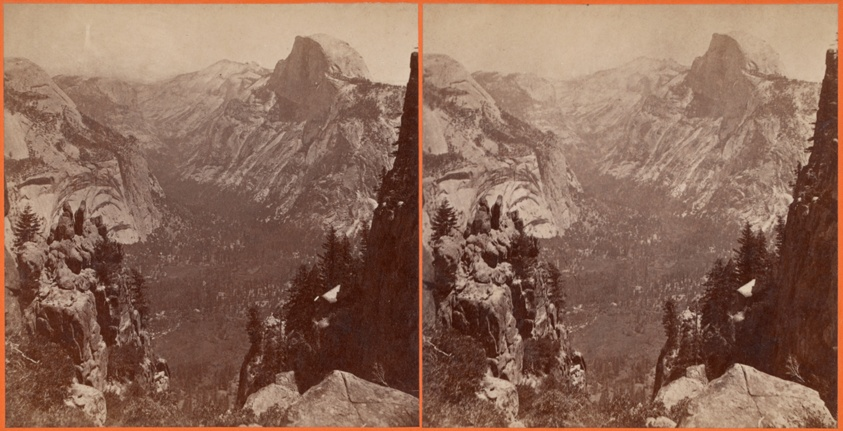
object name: Photograph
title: The Domes from Moran Point, Yosemite, from the series "Watkins' Pacific Coast"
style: 19th century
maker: Carleton E. Watkins; American, 1829-1916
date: 1861/76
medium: Albumen print, stereo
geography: United States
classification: stereograph (albumen); albumen silver print; photographic process; photography; photograph